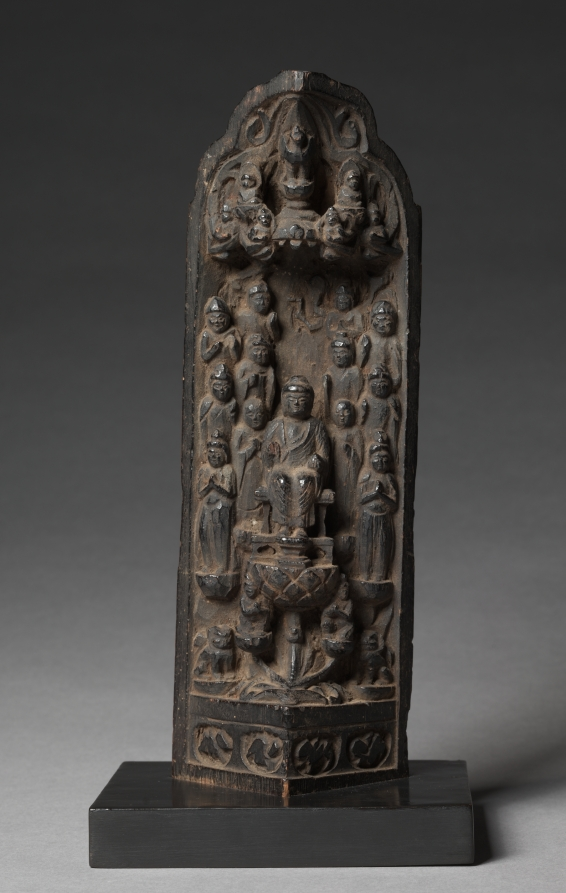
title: Wing of a Portable Shrine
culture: Japan, Heian period (794–1185)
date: 794–1185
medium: wood with lacquer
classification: Sculpture